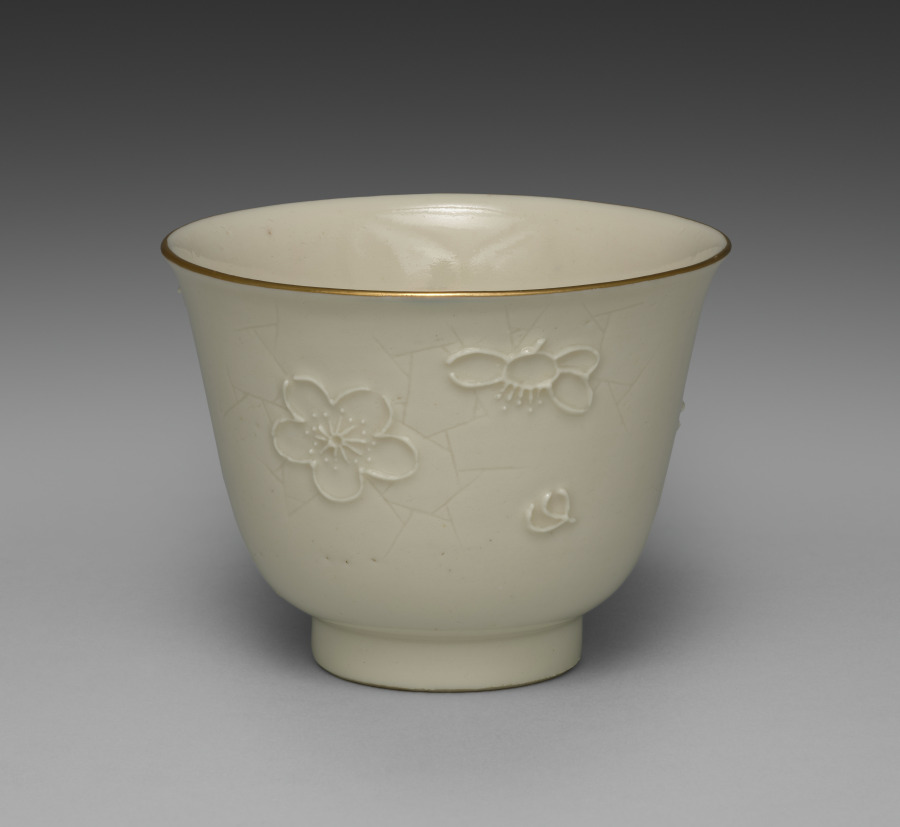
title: Drinking Cup from Dining Set with Plum Blossoms and Cracked-Ice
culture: Japan, Meiji period (1868–1912)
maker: Seifū Yohei II (Japanese, 1844–1878)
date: c. 1875–78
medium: Porcelain with molded designs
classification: Ceramic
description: Each item in this set has a delicate low-relief design of flowering plum branches over scattered, intersecting lines meant to resemble the cracked-ice surface of a frozen body of water and is signed on the base in gold pigment. While Yohei II produced many fine works in underglaze blue, like those produced by Kiyomizu Shichibei, he also made works in quite different styles later in his career, from the early 1870 s. In 1873, he was appointed purveyor to the Industrial Center of Kyoto Prefecture, a designation associated with Kyoto’s efforts to reach an international market through the port of Kobe; and from 1875 until his death, he was involved in national-level projects to present Japanese ceramics across the world. It was during this period that Yohei III was apprenticed to Yohei II, and it has been suggested that this set may in fact be an early example of Yohei III’s work, which he signed with his teacher’s name. Decorated with flowers resembling Japanese textile motifs, the set calls to mind the design of Yohei II’s pair of vases with plum blossoms in the Victoria and Albert Museum. Here, the elaborate trees created for a formal public exhibition setting have been translated into the approachable blossoms of the genteel domestic environment. While the designs are consistent across the pieces, each raised flower petal and pistil and each incised line in the ice was done by hand, so the cups, bowls, and dishes are similar yet unique. The bottoms of two boxes once identified the set’s owner, but the information has been deliberately obscured with black ink. However, inscriptions still visible appear to indicate two occasions, once at the end of July 1886 , and once again in June 1916 , when parts of the set were requested from Hokura in Niigata Prefecture. The location corresponds to a neighborhood in the present-day city of Jōetsu. The surname Tsuji 辻 also appears on a paper tag affixed to one of the box cloths. Future research may possibly reveal more about their provenance. A vase by Yohei III in a private collection combines the formal grandeur of the Yohei II vases in the Victoria and Albert Museum with the gentler design of this dining set, placing flowering plum trees against soft, scalloped-edge clouds resembling those in golden screens.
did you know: The dining wares have a creamy white coloration that the four boxes containing them identify as Korean in style.